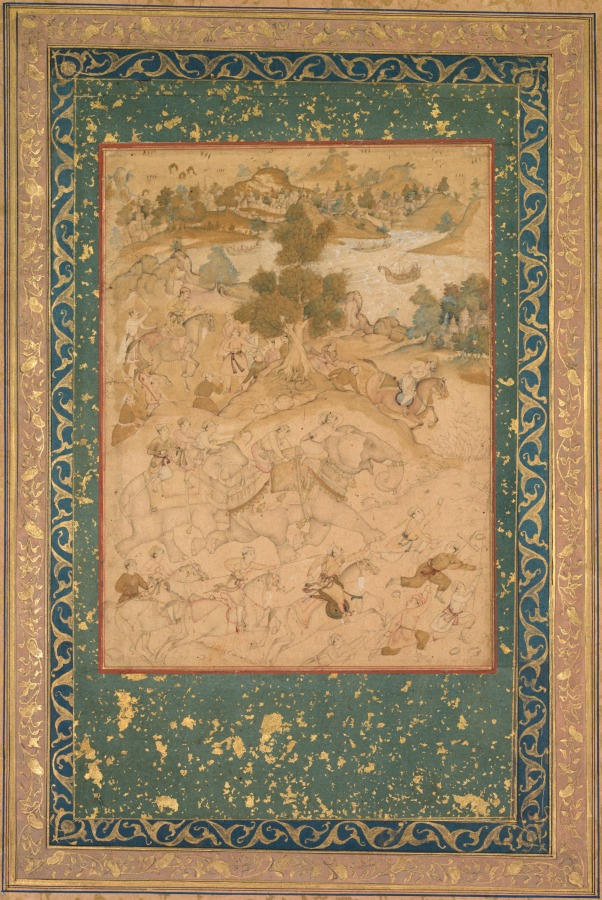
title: Akbar supervising the capture of wild elephants at Malwa in 1564, painting 90 from an Akbar-nama (Book of Akbar) of Abu’l Fazl (Indian 1551–1602)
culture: India, Mughal court, made for Emperor Akbar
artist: attributed to Farukh Chela (Indian)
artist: or Govardhan (Indian, active c.1596–1645)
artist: or Dhanraj (Indian)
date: c. 1602–3; borders added c. 1700s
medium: ink with use of colors and gold on paper, mounted on an album page with borders of gold-decorated buff and blue paper (verso); calligraphy by Faqir Ali (recto)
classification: Painting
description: This painting is from a biography of Akbar made shortly before his death. It depicts a historical event from early in his reign when he encountered a herd of wild elephants and captured many of them for his royal stables. Akbar rides horseback in the upper left, directing his men as two trained elephants give chase in the foreground. The Mughals caught wild elephants by chasing them with tame elephants, then tethering them together and feeding them their favorite food. European prints had made their way into Akbar’s collection, and they provided the visual source for distant cityscapes, rolling hills, and less densely colored paintings.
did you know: A yak-tail flywhisk, ancient Indian symbol of sovereignty, is held up for Akbar.